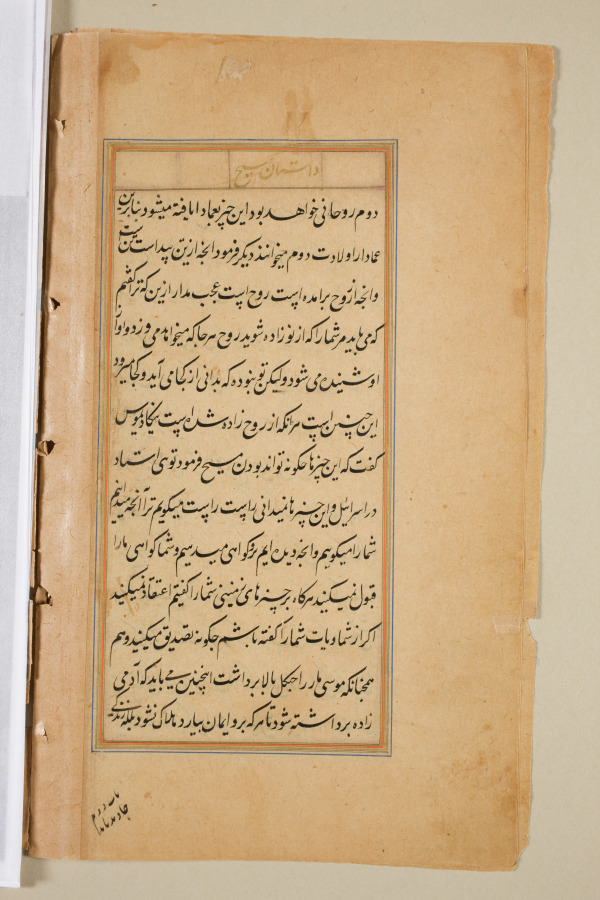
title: Text page from a Mirror of Holiness (Mir’at al-quds) of Father Jerome Xavier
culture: Mughal India, Allahabad, made for Prince Salim (1569–1627)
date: 1602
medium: Ink and gold on paper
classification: Manuscript